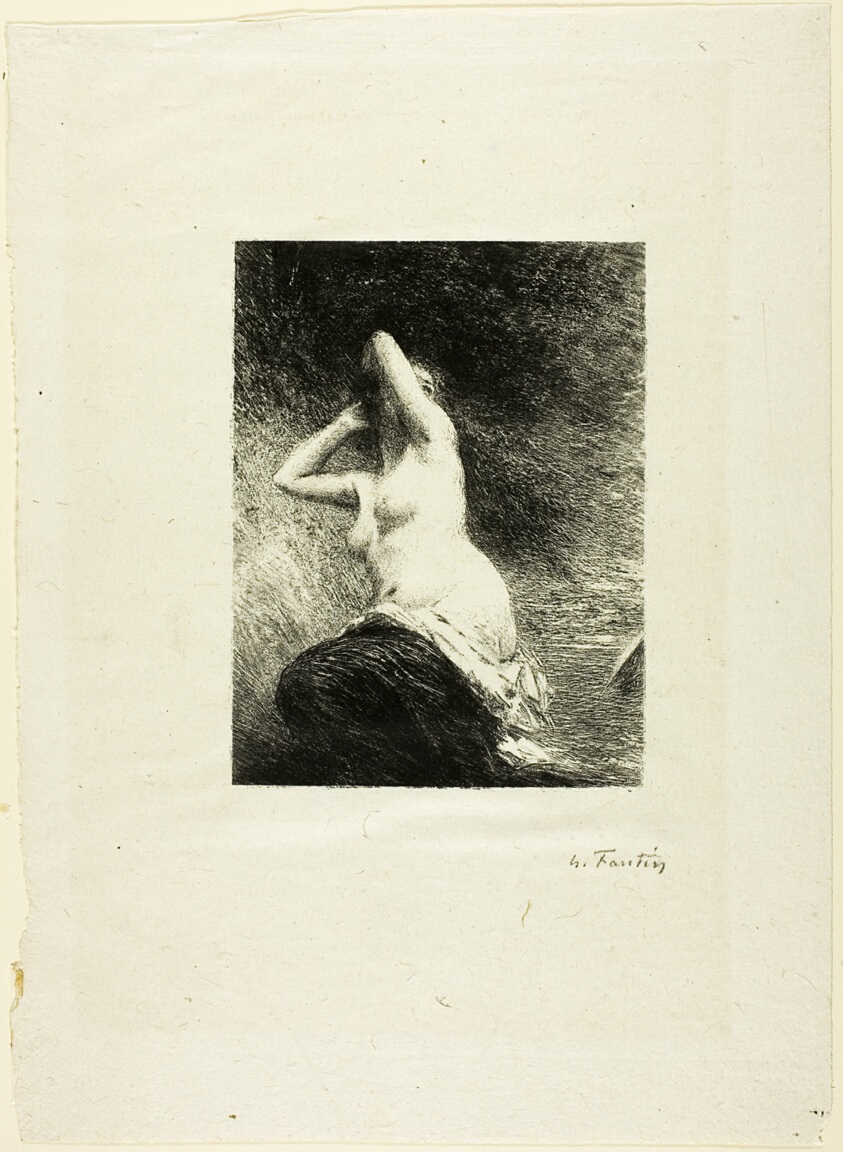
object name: Print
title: Ariadne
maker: Henri Fantin-Latour (French, 1836-1904)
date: 1899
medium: Lithograph in black on light gray chine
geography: France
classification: lithograph; print; prints and drawing